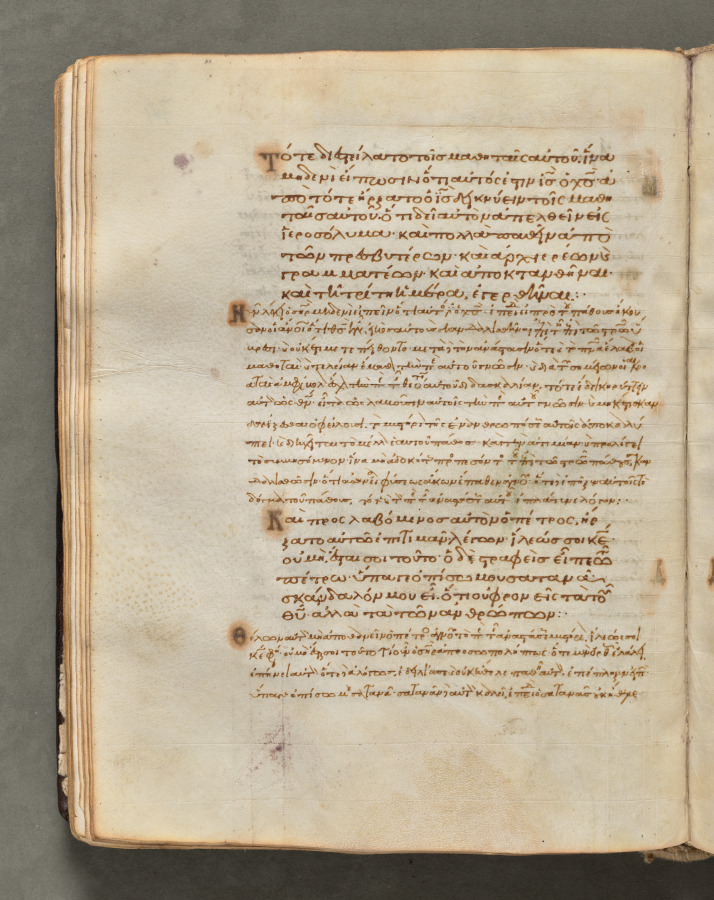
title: Text, folio 74 (verso), from a Gospel Book with Commentaries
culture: Byzantium, Constantinople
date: c. 1000–1100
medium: ink, tempera, and gold on vellum; leather binding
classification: Bound Volume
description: Each of the four gospels in this book opens on a page with brilliantly illuminated borders depicting the author of the text as well as birds-principally peacocks, symbols of the immortality of the soul-and fountains, representing the fountain of life and the salvation of the soul. This volume consists of 428 leaves with texts in Greek. Its level of sophistication suggests that it was probably written and decorated in a monastery in Constantinople.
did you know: Gospel Books were carried in procession through Byzantine churches.